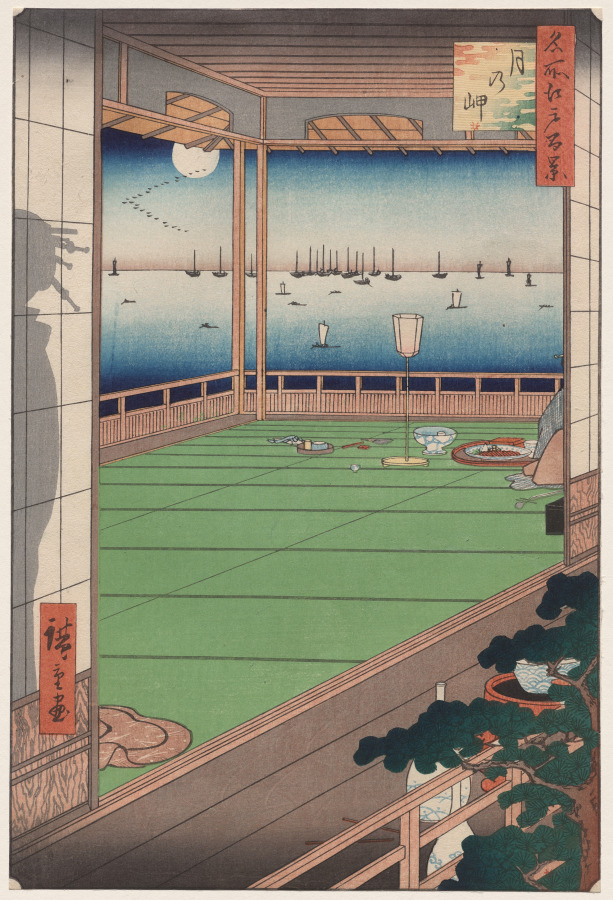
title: The Moon-Viewing Promontory, from One Hundred Views of Famous Places in Edo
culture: Japan, Edo period (1615–1868)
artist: Utagawa Hiroshige (Japanese, 1797–1858)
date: 1857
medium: color woodblock print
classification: Print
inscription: Signature: Hiroshige ga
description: Here, Utagawa Hiroshige’s design places the viewer by pine trees, peering beyond a doorway at the end of a moon-viewing party. The silhouette of a figure with an elaborate hairstyle is visible through a translucent paper door; only the person’s hem trails into view. Another individual remains seated on the floor in the upper right, near a musical instrument and a tray with blue-and-white ceramics, possibly still admiring the autumn moon over ships in Edo (now Tokyo) Bay.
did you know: Beginning in the 700s, the Japanese held moon-viewing parties in celebration of the full moon during the late summer and autumn months. A full moon is visible in this print.